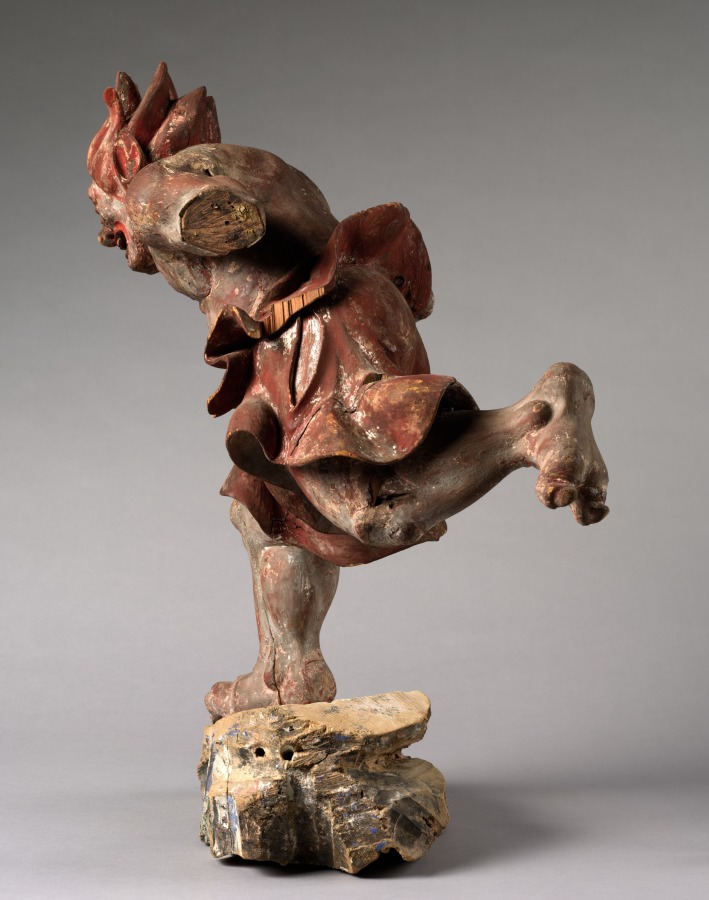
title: Thunder God (Raijin)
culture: Japan, Kamakura period (1185–1333)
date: 1300s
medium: wood with traces of gesso and red and black pigment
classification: Sculpture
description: The Thunder (Raijin) and Wind (Fujin) gods first appeared in early Buddhist art in China and Japan and were based on the popular imagery in India that was derived from the life of the historical Buddha, Shakyamuni. They were shown among a group of demon-monsters flying through the sky above the meditating Shakyamuni in an attempt to frighten away his concentration. Raijin is surrounded by a ring of small drums struck by a stick held in his hand so that he is always accompanied by a thunderous noise. A metal clasp protruding from this sculptures' back indicates that a ring of drums was once attached to the Cleveland Raijin. The matching sculpture, Fujin, is in the Fukuoka Art Museum in Japan.